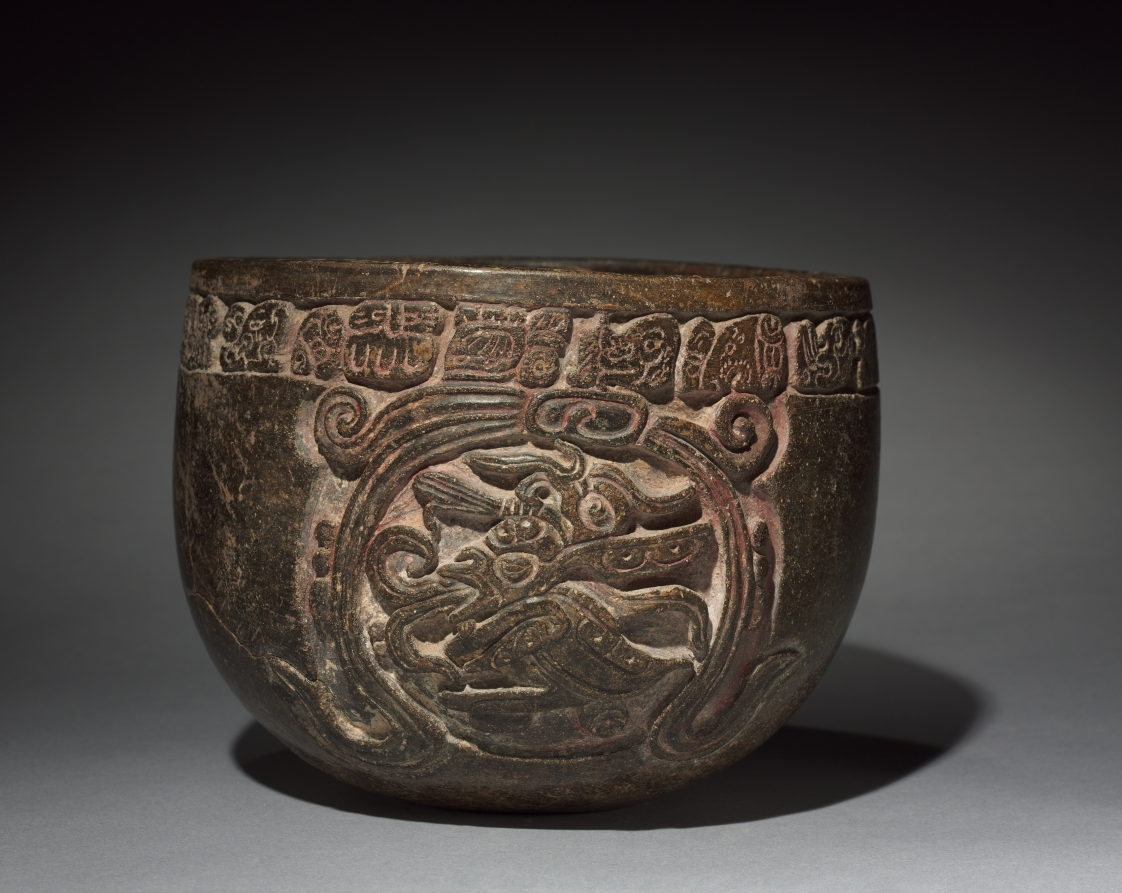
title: Carved Vessel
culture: Mexico, Campeche, Maya, Chocholá Style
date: c. 600–1000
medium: earthenware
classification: Ceramic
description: A firefly is carved on both sides of this Maya vessel, which is from the Yucatán Peninsula. Among the most common of insects to appear in Maya art, the firefly seems to be associated with things that twinkle in the dark—stars and cigars, the latter a symbol that identifies creatures of the night.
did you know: The text on the rim mentions a young man, suggesting this vessel was involved in a rite-of-passage ceremony.